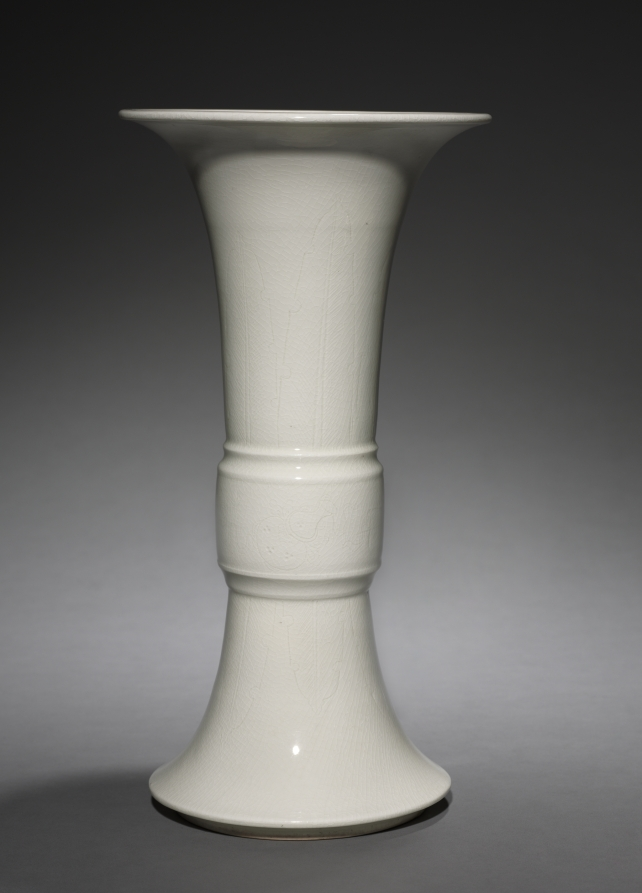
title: Beaker Vase: Zun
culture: China, Qing dynasty (1644-1911), Kangxi reign (1661-1722)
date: 1661–1722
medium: porcelain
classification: Ceramic